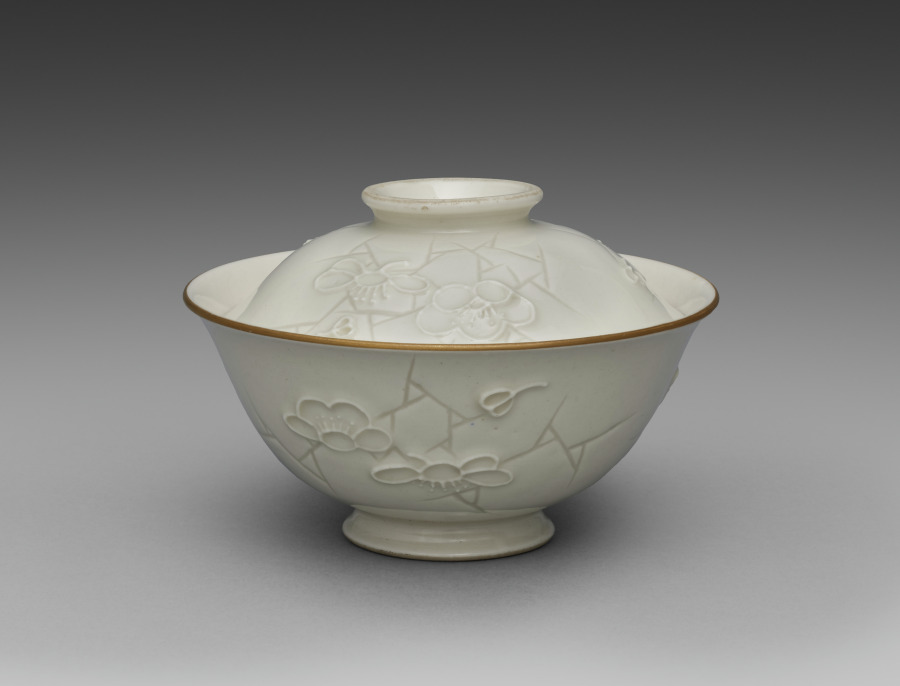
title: Covered Bowl from Dining Set with Plum Blossoms and Cracked-Ice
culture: Japan, Meiji period (1868–1912)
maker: Seifū Yohei II (Japanese, 1844–1878)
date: c. 1875–78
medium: Porcelain with molded designs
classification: Ceramic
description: Each item in this set has a delicate low-relief design of flowering plum branches over scattered, intersecting lines meant to resemble the cracked-ice surface of a frozen body of water and is signed on the base in gold pigment. While Yohei II produced many fine works in underglaze blue, like those produced by Kiyomizu Shichibei, he also made works in quite different styles later in his career, from the early 1870 s. In 1873, he was appointed purveyor to the Industrial Center of Kyoto Prefecture, a designation associated with Kyoto’s efforts to reach an international market through the port of Kobe; and from 1875 until his death, he was involved in national-level projects to present Japanese ceramics across the world. It was during this period that Yohei III was apprenticed to Yohei II, and it has been suggested that this set may in fact be an early example of Yohei III’s work, which he signed with his teacher’s name. Decorated with flowers resembling Japanese textile motifs, the set calls to mind the design of Yohei II’s pair of vases with plum blossoms in the Victoria and Albert Museum. Here, the elaborate trees created for a formal public exhibition setting have been translated into the approachable blossoms of the genteel domestic environment. While the designs are consistent across the pieces, each raised flower petal and pistil and each incised line in the ice was done by hand, so the cups, bowls, and dishes are similar yet unique. The bottoms of two boxes once identified the set’s owner, but the information has been deliberately obscured with black ink. However, inscriptions still visible appear to indicate two occasions, once at the end of July 1886 , and once again in June 1916 , when parts of the set were requested from Hokura in Niigata Prefecture. The location corresponds to a neighborhood in the present-day city of Jōetsu. The surname Tsuji 辻 also appears on a paper tag affixed to one of the box cloths. Future research may possibly reveal more about their provenance. A vase by Yohei III in a private collection combines the formal grandeur of the Yohei II vases in the Victoria and Albert Museum with the gentler design of this dining set, placing flowering plum trees against soft, scalloped-edge clouds resembling those in golden screens.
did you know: The dining wares have a creamy white coloration that the four boxes containing them identify as Korean in style.